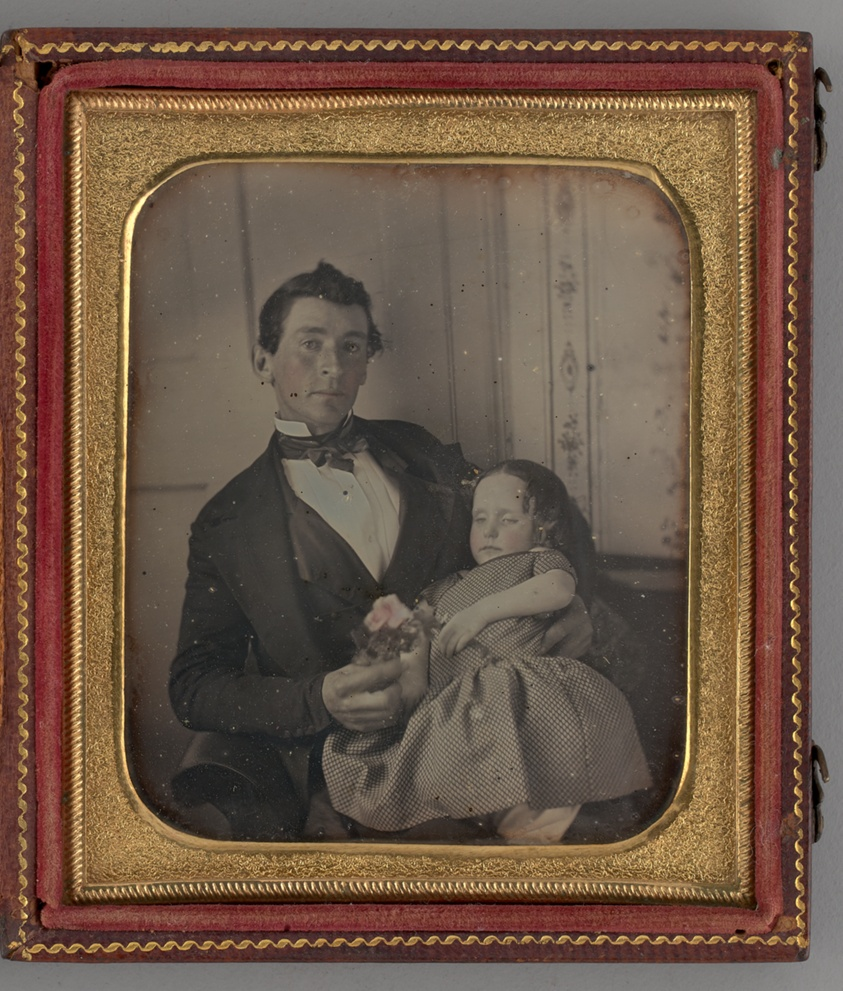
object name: Photograph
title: Untitled (Portrait of man Holding a Girl)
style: 19th century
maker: Unknown maker; American, 19th century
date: 1852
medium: Daguerreotype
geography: United States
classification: portrait; photograph; photographic process; photography; portrait; daguerreotype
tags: lundberg collection, portrait, Male, babies, portraits, portraits: child subject